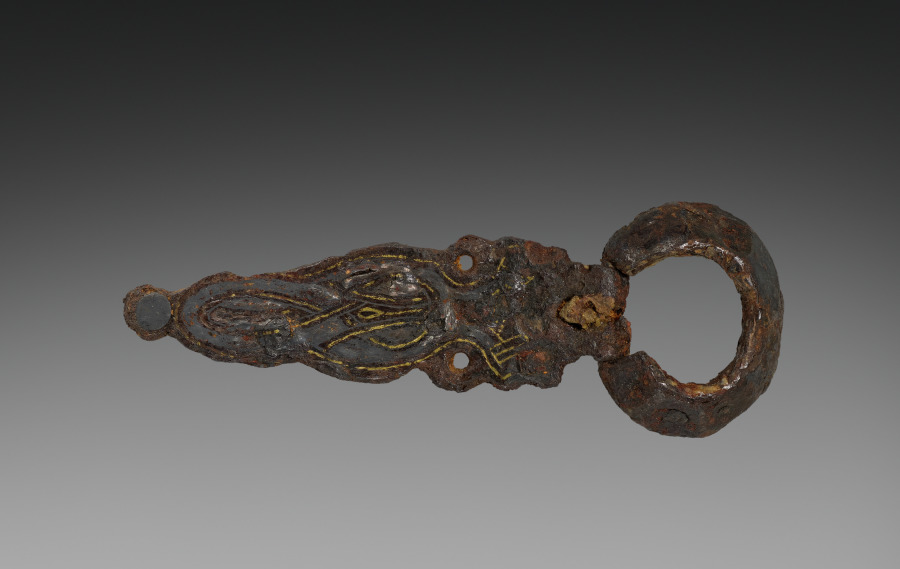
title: Buckle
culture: Merovingian, Burgundian, Migration period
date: 600s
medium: iron with gold and silver overlay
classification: Jewelry